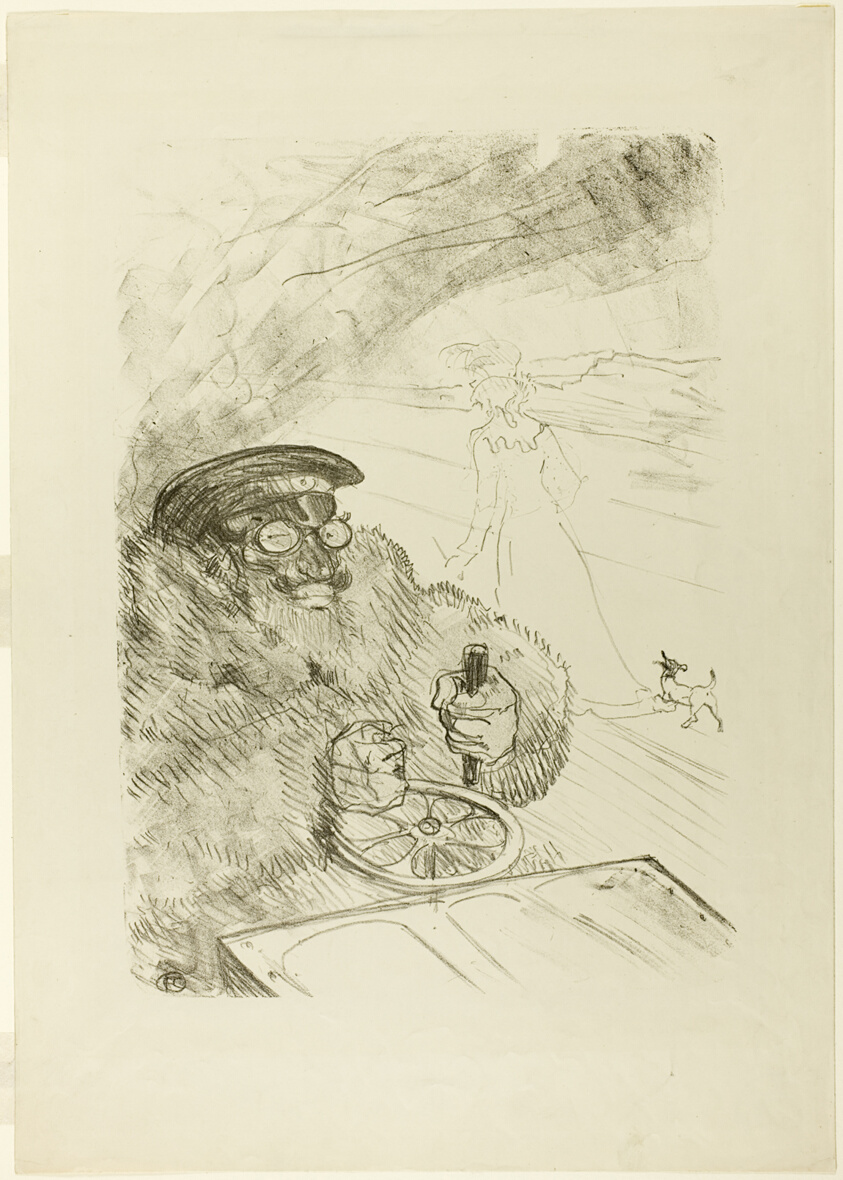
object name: Print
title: The Motorist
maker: Henri de Toulouse-Lautrec (French, 1864-1901)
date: 1896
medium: Lithograph on cream wove paper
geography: France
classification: lithograph; print; prints and drawing